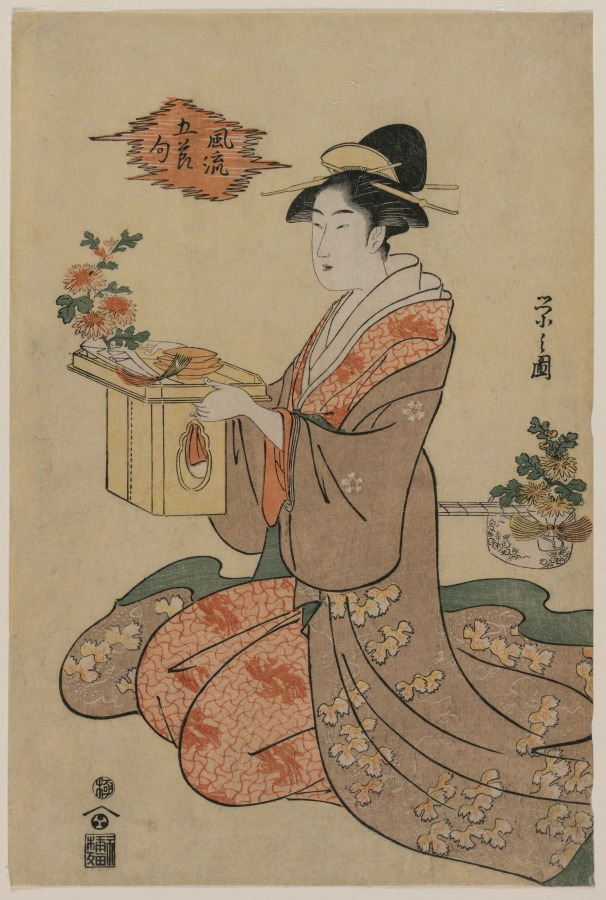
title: Woman Holding a Wooden Cup Stand Decorated with Chrysanthemums (from the series Elegant Pictures of the Five Seasonal Festivals)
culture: Japan, Edo period (1615–1868)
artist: Chōbunsai Eishi (Japanese, 1756–1829)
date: mid 1790s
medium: color woodblock print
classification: Print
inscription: Signature: Eishi zu Seal: kiwame